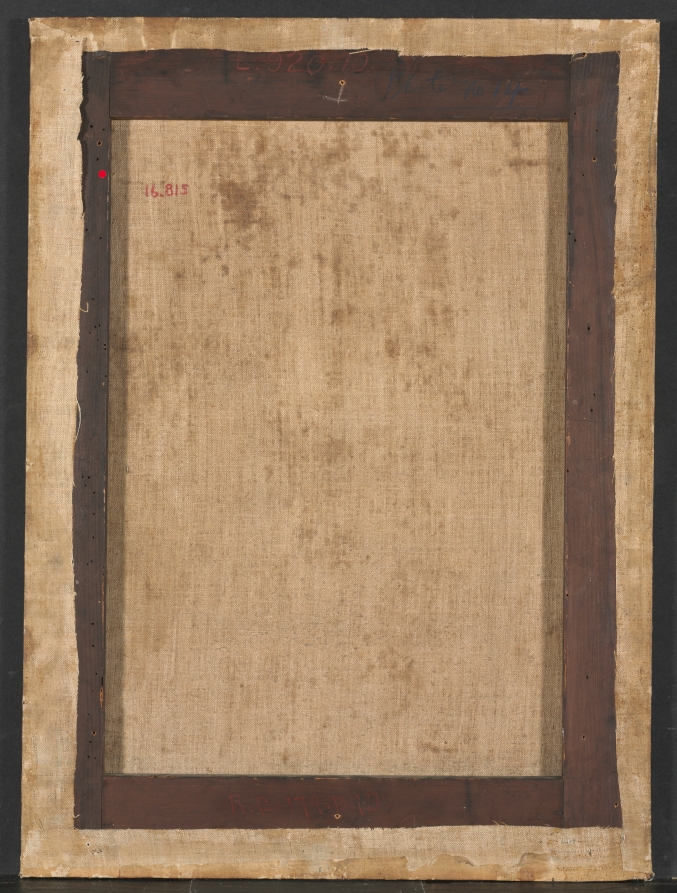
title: Portrait of Pope Sixtus IV della Rovere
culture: Spain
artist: Pedro Berruguete (Castilian, c. 1445/1450-1503)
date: c. 1476–82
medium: oil on wood, transferred to canvas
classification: Painting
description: Spanish artist Pedro Berruguete spent a decade in Italy in the 1470s and 1480s, including a period in Rome during which he painted Pope Sixtus IV della Rovere from life. Here, the pope raises his hand in a gesture of benediction, blessing the viewer while meeting their gaze. Using white highlights to represent the glittering luminosity of the bejeweled garments, Berruguete accentuates Sixtus IV’s sumptuous attire, including the triregnum, or ceremonial triple crown and symbol of the papacy.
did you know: James Jackson Jarves (1818–1888)—famed art critic and one of the first Americans to amass a collection of medieval, Renaissance, Mannerist, and Baroque paintings from Italy—owned this painting in the late 19th century.